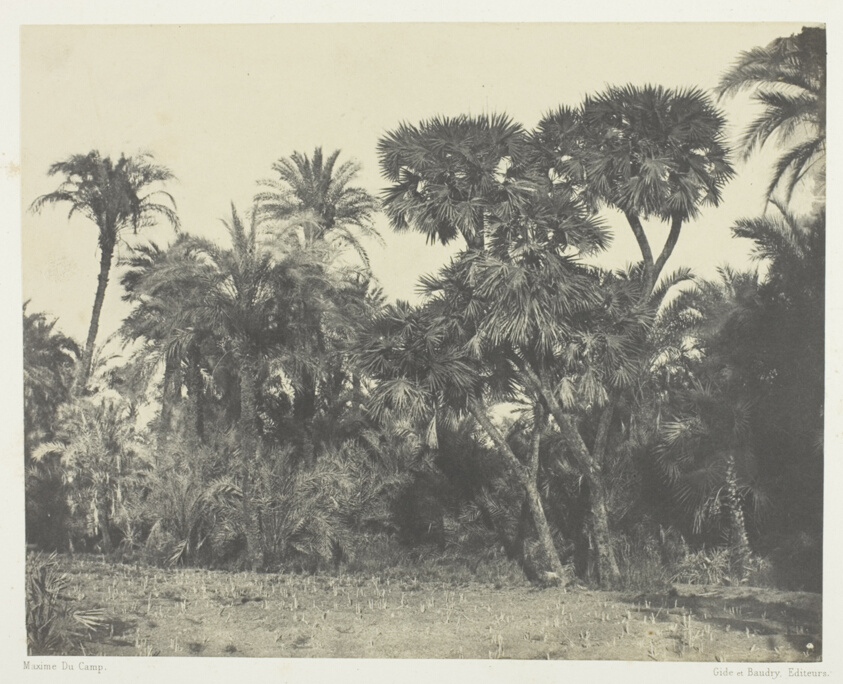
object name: Photograph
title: Bois de Dattiers et de Palmiers Doums, Haute-Egypte, plate 23 from the album "Egypte, Nubie, Palestine et Syrie" (1852)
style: 19th century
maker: Maxime Du Camp (French, 1822–1894)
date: 1849/51, printed 1852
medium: Salted paper print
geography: France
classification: salted paper print; photographic process; photography; photograph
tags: Collected by Hugh Edwards, Egypte, Nubie, Palestine et Syrie